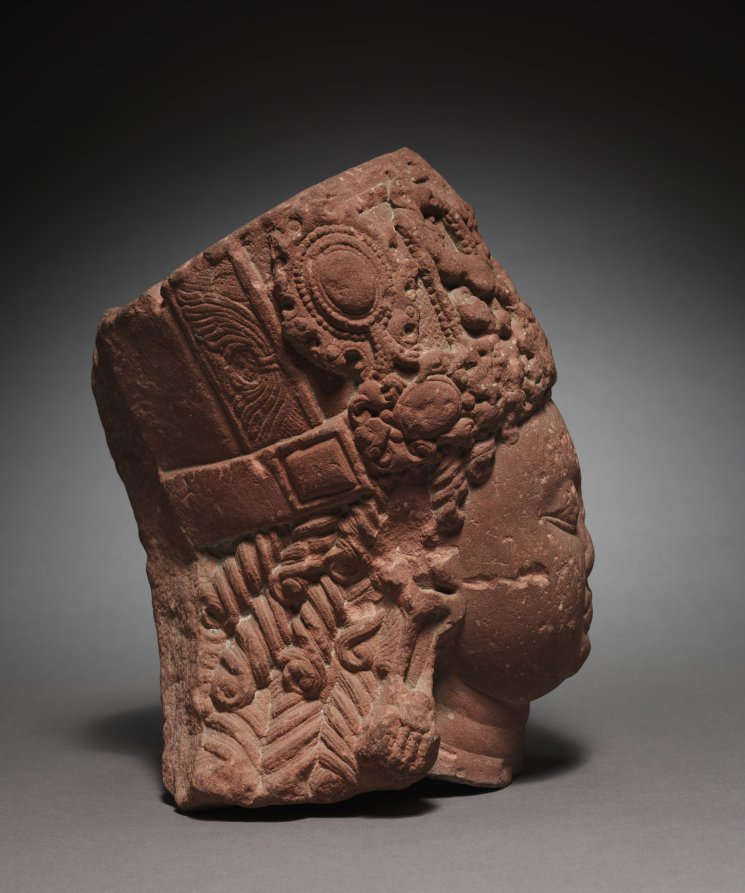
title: Head of Vishnu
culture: Northern India, Uttar Pradesh, Mathura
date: 400s CE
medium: sandstone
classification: Sculpture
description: During this period in India, the Hindu god Vishnu wears a distinctive squarish crown with a central medallion featuring a lion head. With strings of pearls issuing from his mouth, the imagery conveys the idea of radiance and glory. Devotees recognized Vishnu as having solar and royal attributes. His coiled ringlets of hair and heavy earrings also indicate that he was meant to have the appearance of a royal warrior.